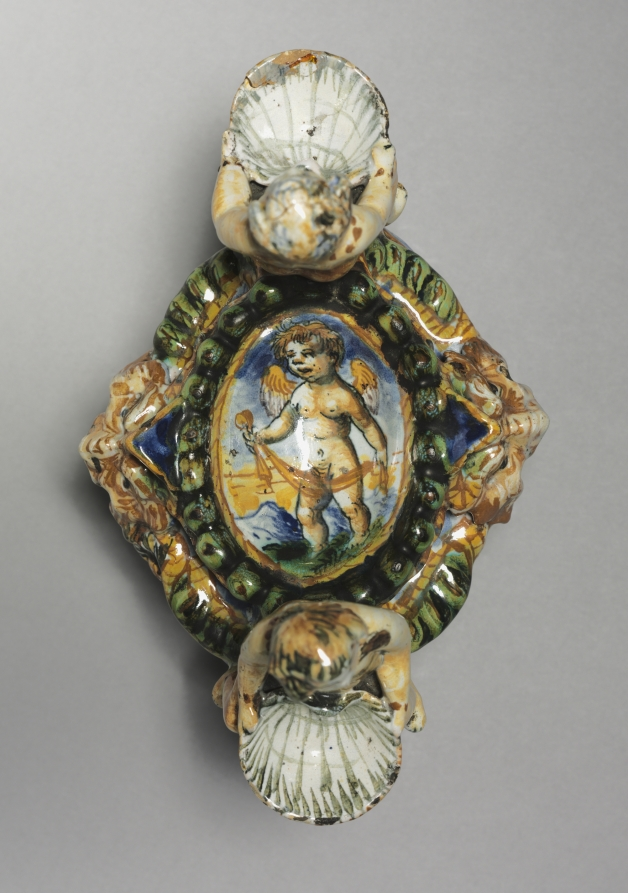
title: Saltcellar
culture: Italy, Urbino, 16th century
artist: circle of the Patanazzi Family (Italian)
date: c. 1570–90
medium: tin-glazed earthenware (maiolica)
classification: Ceramic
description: During the Italian Renaissance of the 1400s and 1500s, nobles and merchants eager to express their wealth and sophistication ordered ceramics for dining, display, and storage. Known as maiolica, because it resembled the brightly colored ceramics from the Mediterranean island of Majorca, these ceramic vessels were covered with a tin glaze that provided an opaque white surface on which colorful decoration could be painted.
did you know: During the Renaissance, salt was an expensive commodity and was used to both season and preserve food.